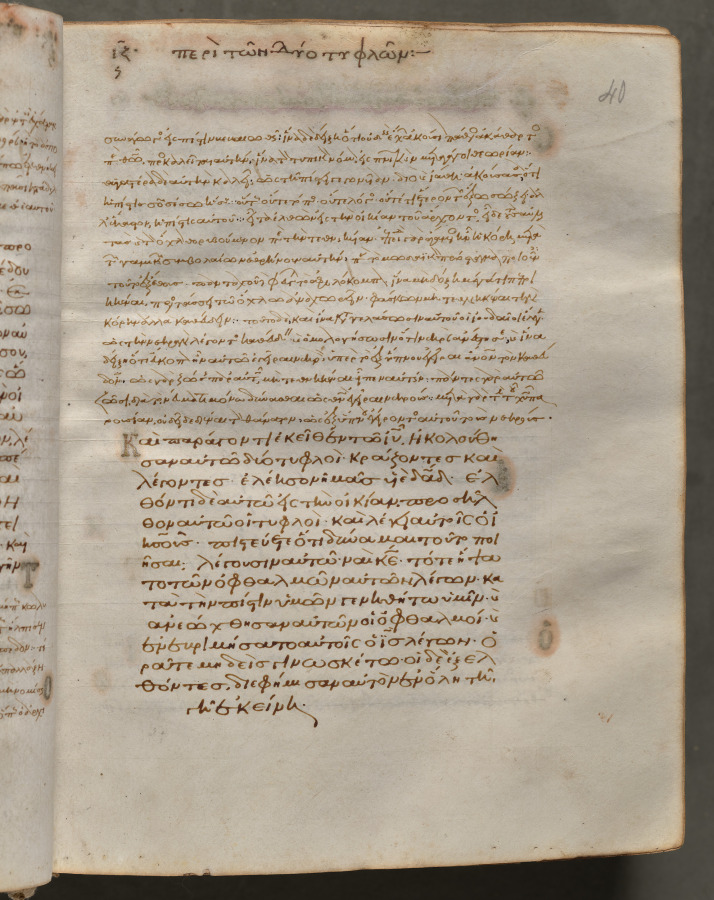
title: Text, folio 40 (recto), from a Gospel Book with Commentaries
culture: Byzantium, Constantinople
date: c. 1000–1100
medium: ink, tempera, and gold on vellum; leather binding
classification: Bound Volume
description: Each of the four gospels in this book opens on a page with brilliantly illuminated borders depicting the author of the text as well as birds-principally peacocks, symbols of the immortality of the soul-and fountains, representing the fountain of life and the salvation of the soul. This volume consists of 428 leaves with texts in Greek. Its level of sophistication suggests that it was probably written and decorated in a monastery in Constantinople.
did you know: Gospel Books were carried in procession through Byzantine churches.